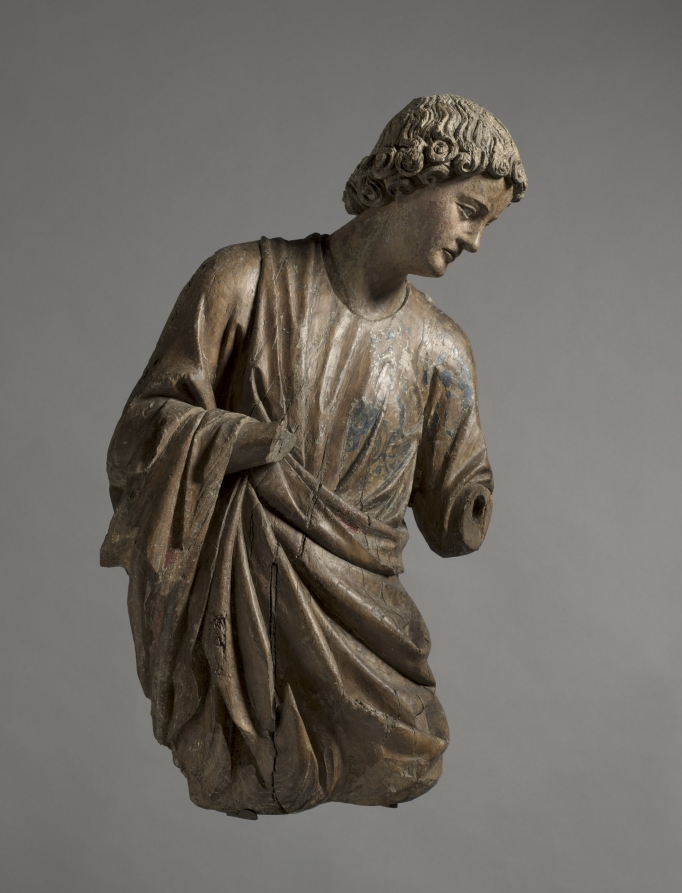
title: Angel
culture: France, vicinity of Reims, 13th century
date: c. 1250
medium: walnut with traces of gilding and polychromy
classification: Sculpture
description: Surviving in fragmentary condition, this pair of angels lacks lower arms, hands, wings, and attributes. Their original paint and gilding, now almost entirely lost, once rendered their garments a rich brocade and their hair a luxuriant gold. Nonetheless, in their graceful poses and sublime faces—which may portray tragic interest, anguish, or deep concern—their original delicacy and power are still evident. They embody the monumental style of 13th-century High Gothic cathedral sculpture in France. Their style specifically suggests they were carved in or around Reims, possibly by sculptors associated with the cathedral there. Their original placement is unknown, but they may have flanked an altar on columns.